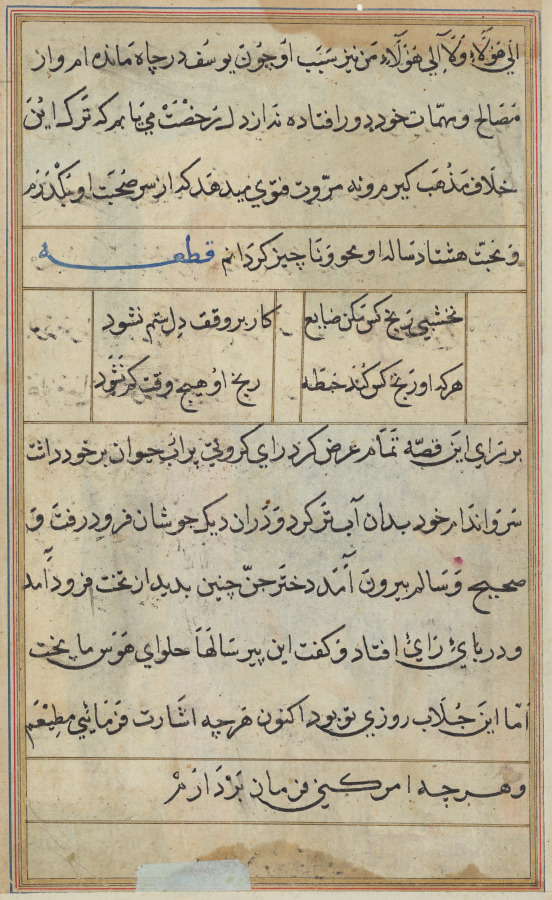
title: Page from Tales of a Parrot (Tuti-nama): text page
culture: Mughal India, court of Akbar (reigned 1556–1605)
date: c. 1560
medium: gum tempera, ink, and gold on paper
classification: Painting